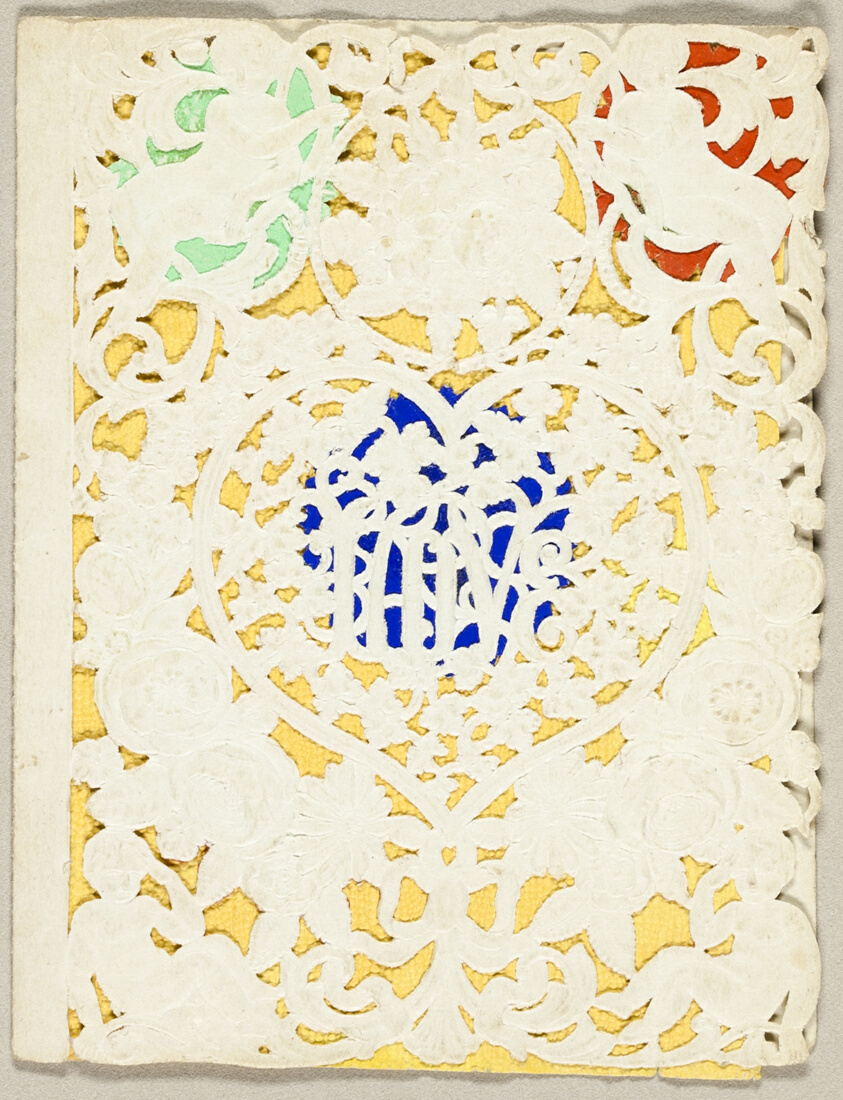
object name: Drawing and Watercolor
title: Love (Valentine)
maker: Unknown Artist; American or English, 19th century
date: 1855–60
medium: Collaged elements under cut and embossed (designed) ivory wove paper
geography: United States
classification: collage; valentine; prints and drawing; paper